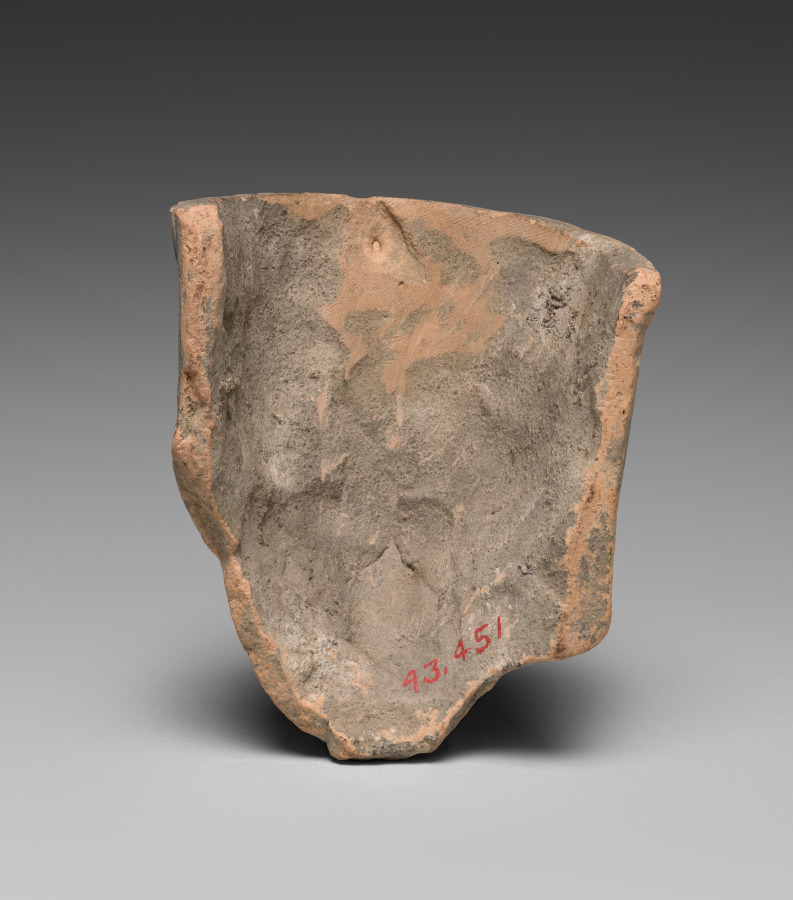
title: Mask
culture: Greece, Sicily, Selinus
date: 550 BCE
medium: terracotta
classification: Sculpture